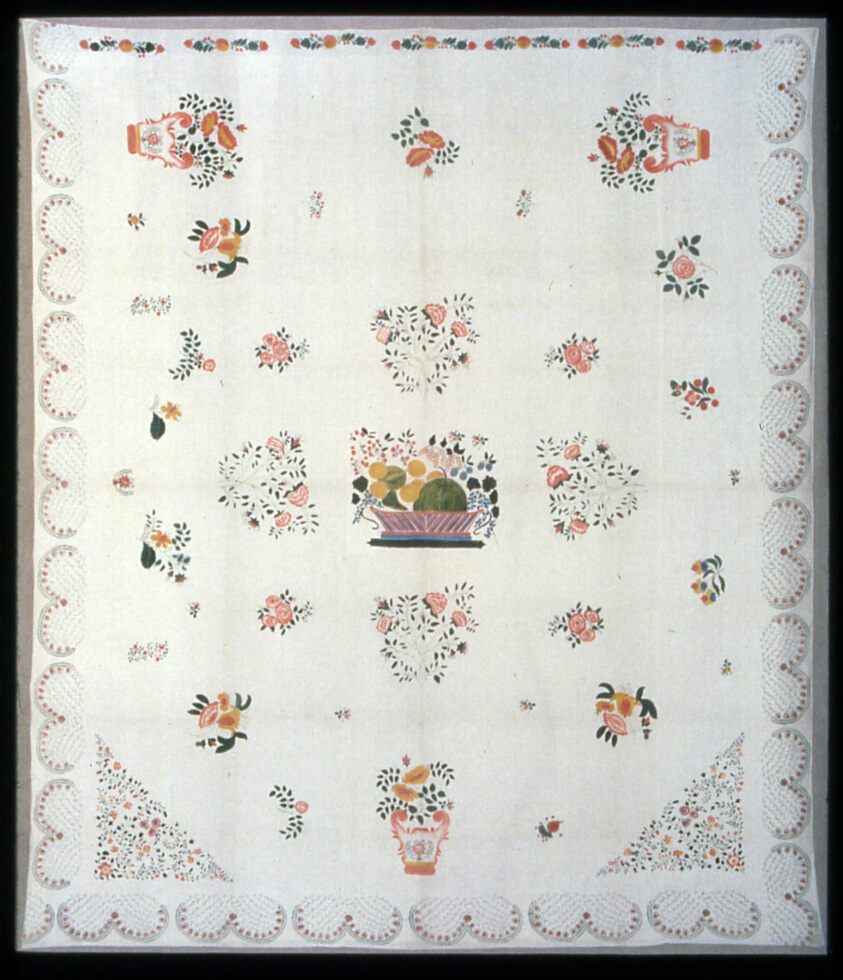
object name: Textile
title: Bedcover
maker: United States, probably New England or Mid-Atlantic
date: c. 1830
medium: Cotton, plain weave; stenciled and painted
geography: United States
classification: textile; weaving - printed; weaving; weaving - coverlet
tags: Chicago